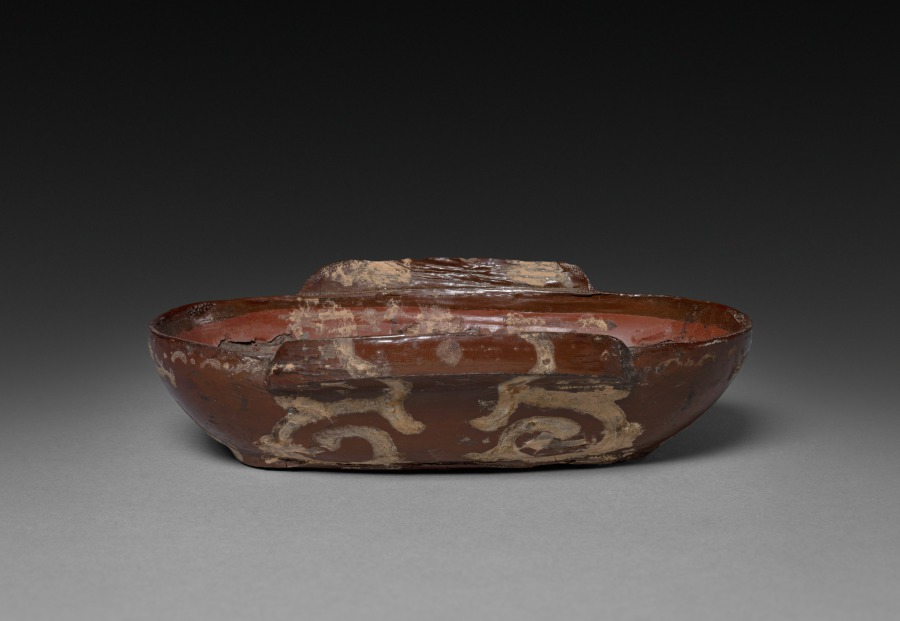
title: Cup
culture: China, Zhou dynasty (c. 1046–256 BCE)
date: c. 600–221 BCE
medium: lacquer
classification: Lacquer